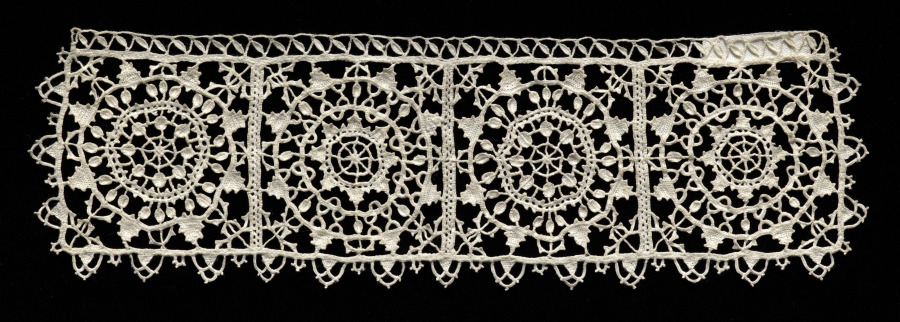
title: Lace Cuff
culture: Italy, Genoa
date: 1550–99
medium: Needle lace (reticella)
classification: Lace